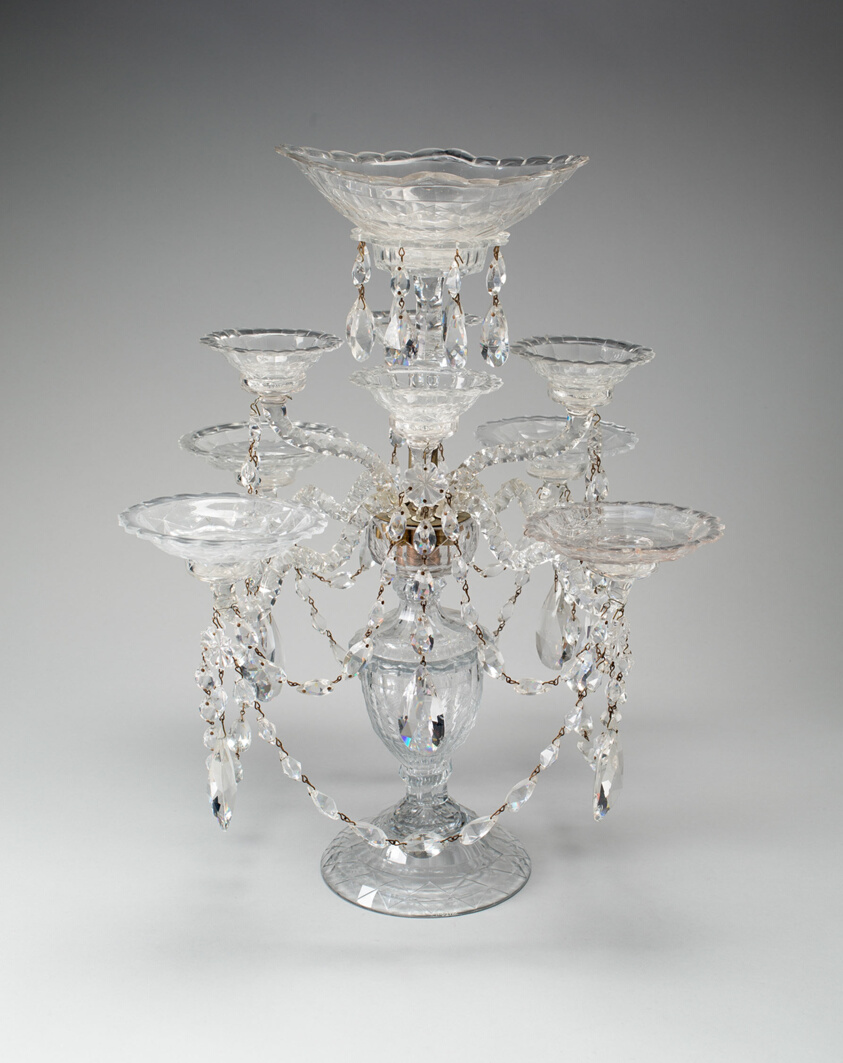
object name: Glass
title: Epergne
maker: England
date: c. 1775/80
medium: Glass; colorless, free blown and cut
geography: England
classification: glass; european decorative arts